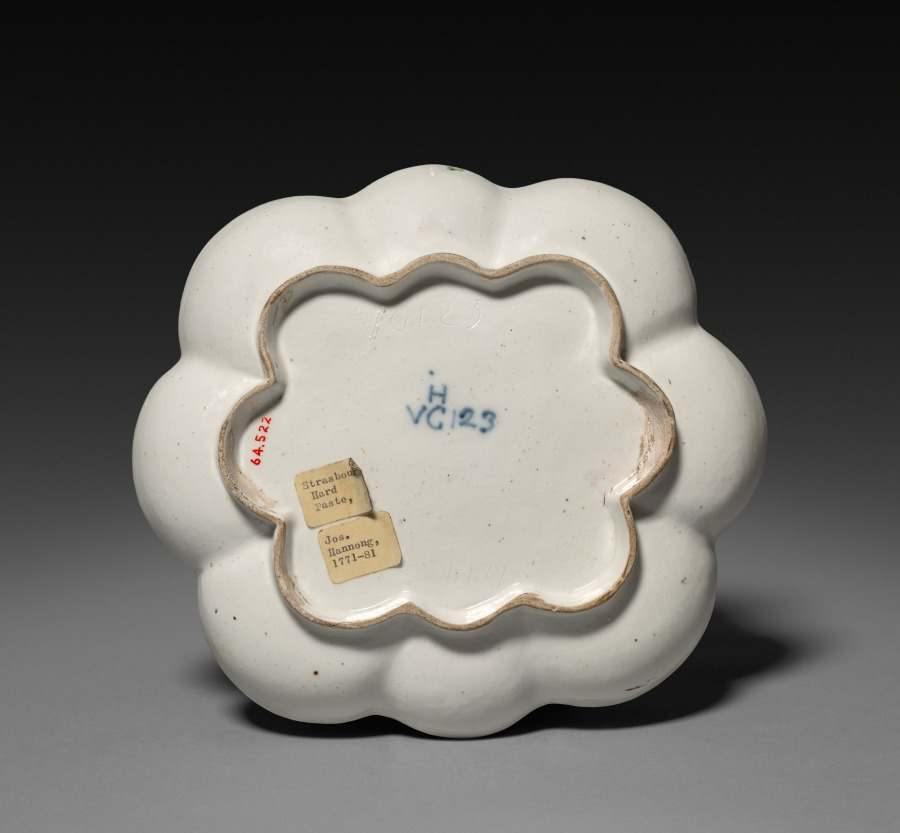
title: Dish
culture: France, Strasbourg, 18th century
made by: Strasbourg Factory (France)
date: 1771–1781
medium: porcelain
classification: Ceramic